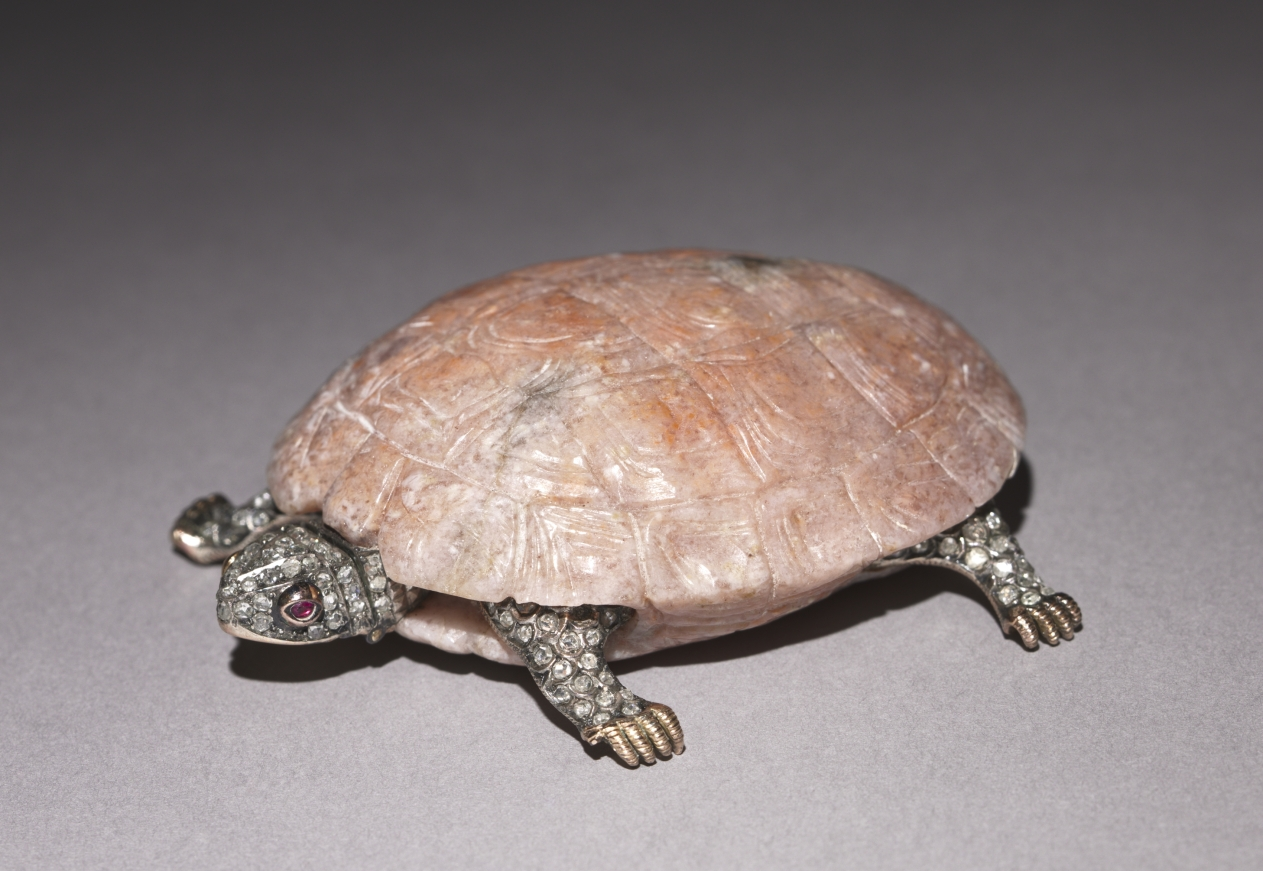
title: Turtle Bell Push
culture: Russia, St. Petersburg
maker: House of Fabergé (Russian, 1842–1918)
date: c. 1895–1915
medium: agate, gold, silver, diamonds, rubies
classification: Miscellaneous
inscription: 7434 scratched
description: In creating luxurious accessories for a desk or tabletop, Fabergé often used native hardstones such as multicolored agate and jasper, green nephrite, pink rhodonite, and rock crystal found in the Ural Mountains of western Russia. By paying careful attention to the unique colors and textures of the stones, Fabergé and his craftsmen brought them to life, turning milky agate into this turtle bell push or black jasper into sleeping puppies. The use of native materials also promoted Russian nationalism, which appealed greatly to the tsar and his family.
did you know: To summon the butler, a quick push on the turtle's head would ring the bell downstairs.